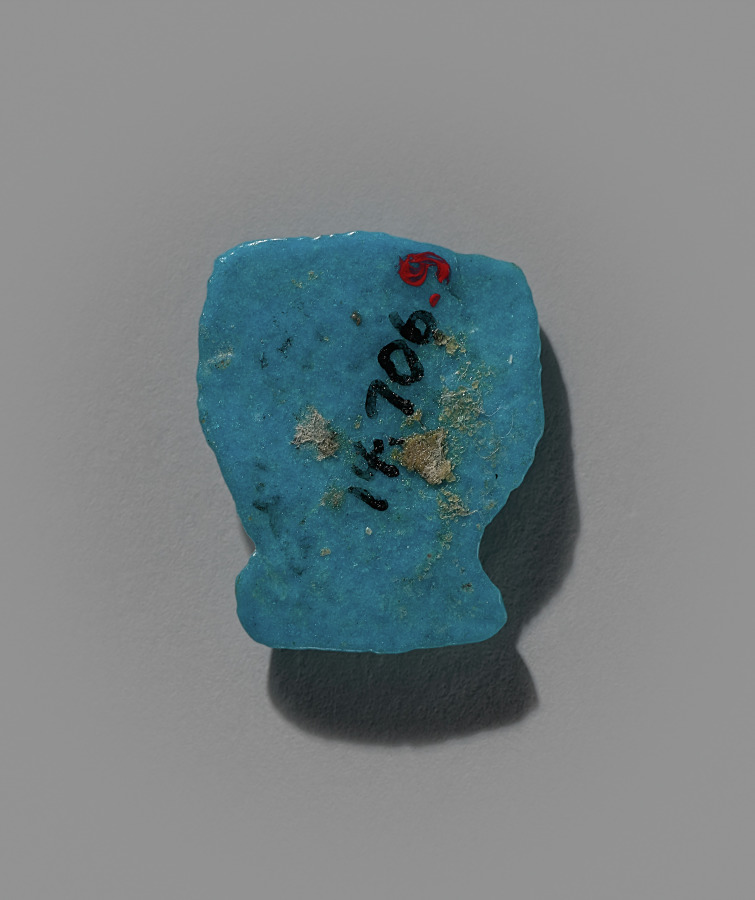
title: Food Model Amulet: Brace of Duck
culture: Egypt, New Kingdom (1540–1069 BCE), Dynasties 19–20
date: 1295–1069 BCE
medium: turquoise faience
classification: Amulets